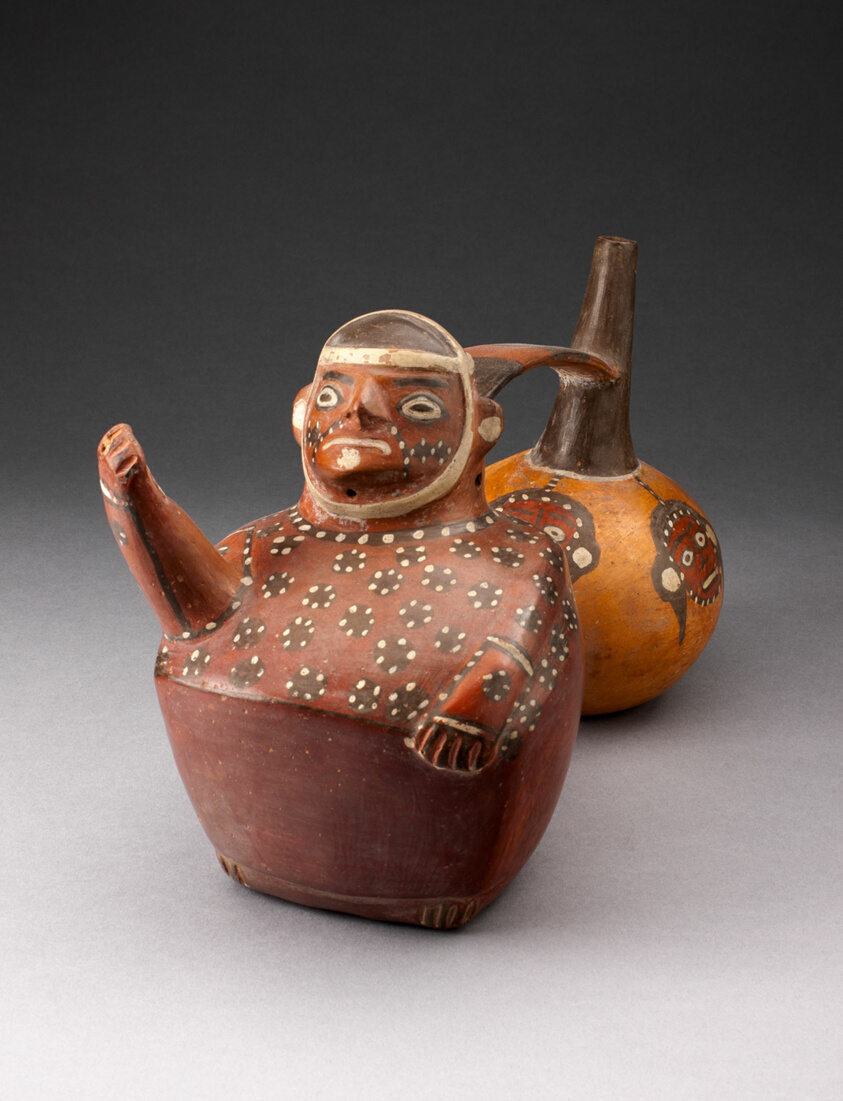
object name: Vessel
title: Double-Chambered Vessel Depicting a Figure and Trophy Heads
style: nieveria, Arts of the Americas, andes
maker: Nievería; Central coast, Peru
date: 500–800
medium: Ceramic and pigment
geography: Nievería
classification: earthenware; art of the americas; ceramics; vessel